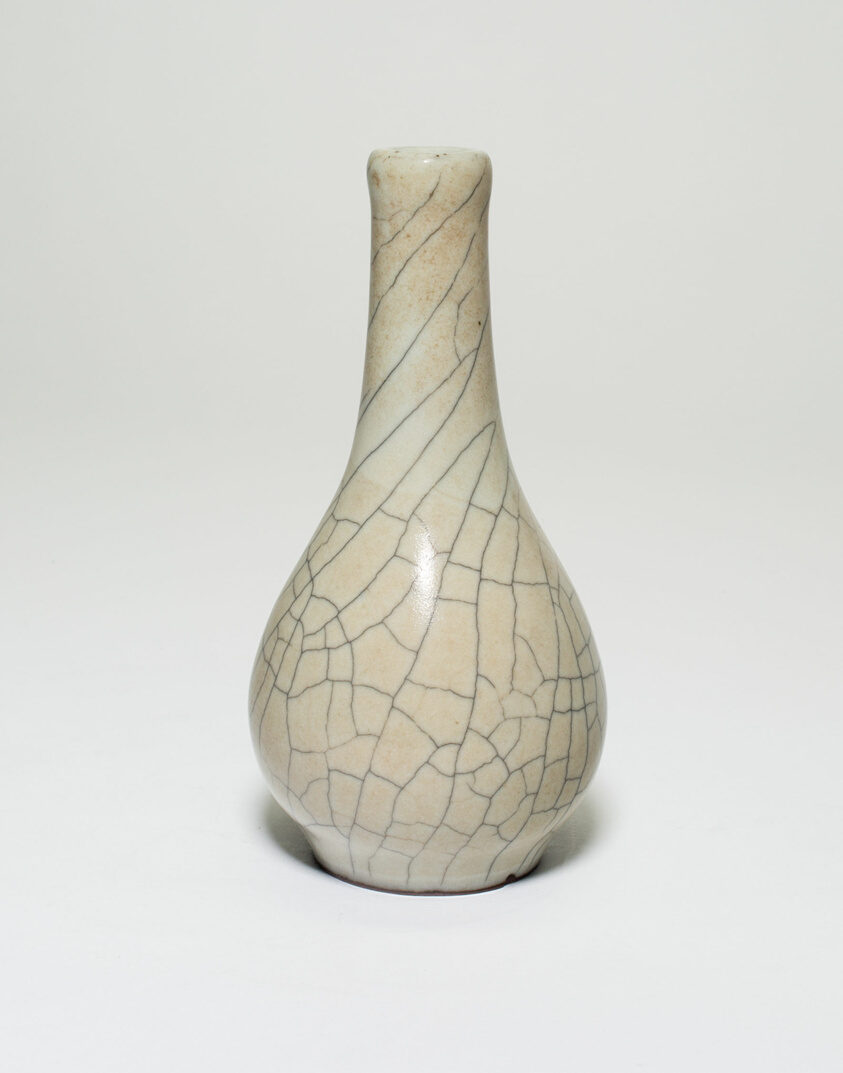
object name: Vessel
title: Bottle-Shaped Vase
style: Chinese (culture or style)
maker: China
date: Yuan dynasty (1271–1368) or possibly Qing dynasty (1644–1911), Yonzheng period (1723–1735)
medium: Ge-type ware; porcelain with crackled grey glaze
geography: China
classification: vase; porcelain; vessel; asian art; ceramics